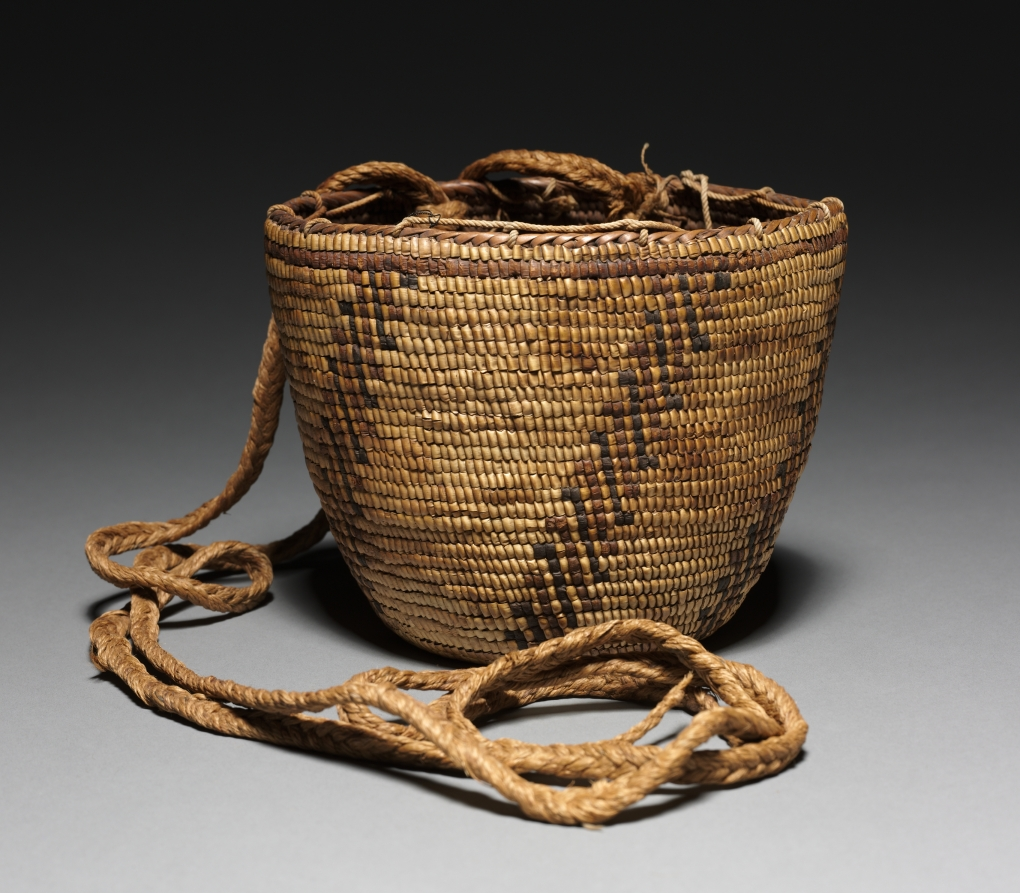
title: Berry Basket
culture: Northwest Coast, coastal, Salish, late 19th century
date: 1890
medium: woven, imbricated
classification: Basketry